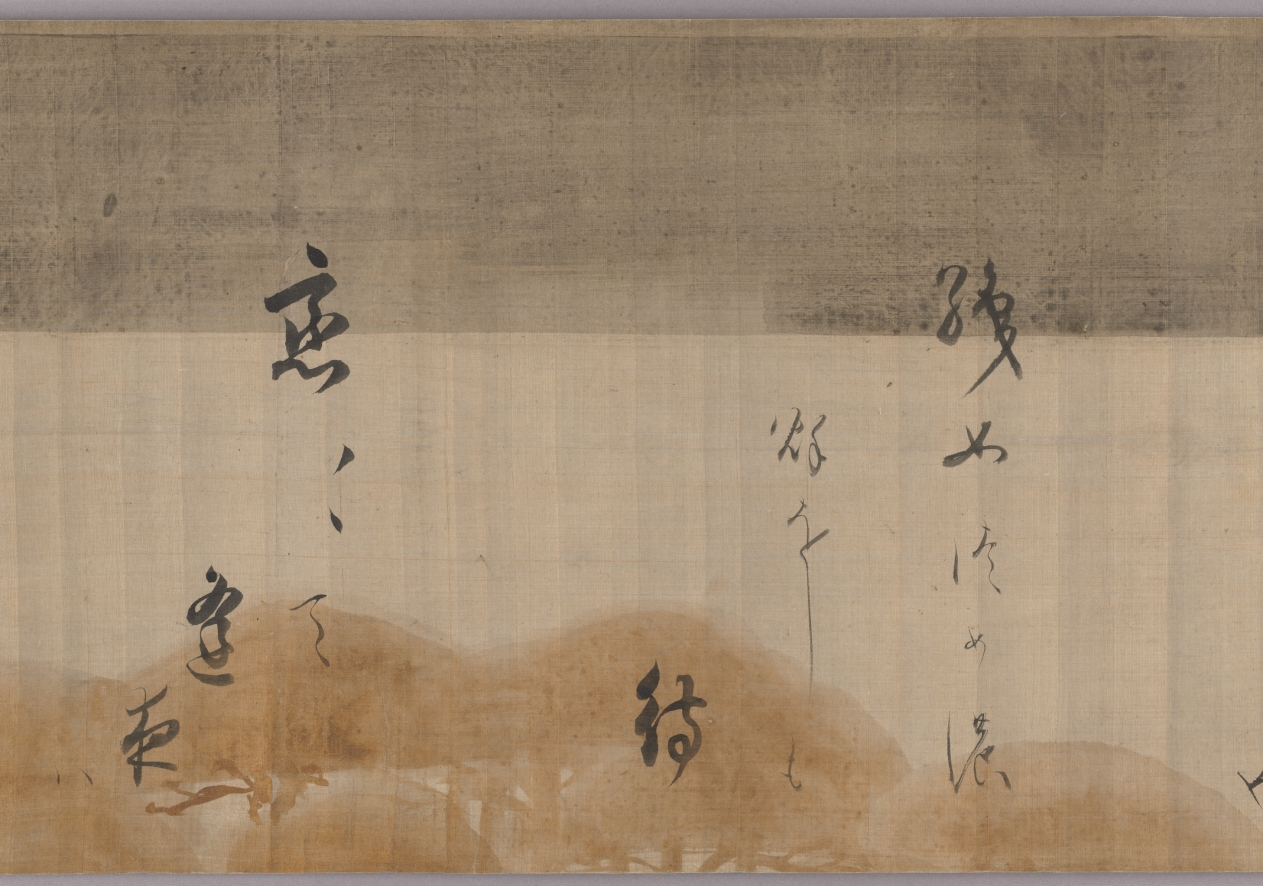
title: Selections from the Collection of Japanese Poems from Ancient and Modern Times (Kokin wakashū) with Design of Pines Along the Shore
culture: Japan, Momoyama period (1573-1615) to Edo period (1615-1858)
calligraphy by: Hon'ami Kōetsu (Japanese, 1558–1637)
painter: attributed to Tawaraya Sōtatsu (Japanese, c. 1570–c. 1640)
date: 1600s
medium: handscroll; ink on silk with gold and silver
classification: Calligraphy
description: The calligrapher and craftsman Hon’ami Kōetsu frequently collaborated with Tawaraya Sōtatsu, a painter who ran a studio that produced fans and screens. Sōtatsu’s work featured abstracted and flattened shapes, fields of color and gold, and asymmetry. In particular, motifs that appeared in small scale, such as flora and fauna, in early decorated Japanese papers were painted in a larger scale—blown up as if seen under a magnifying glass. For this handscroll, Kōetsu brushed poems from the autumn section of a poetry anthology onto silk with a landscape of pines in gold and silver likely painted by Sōtatsu.